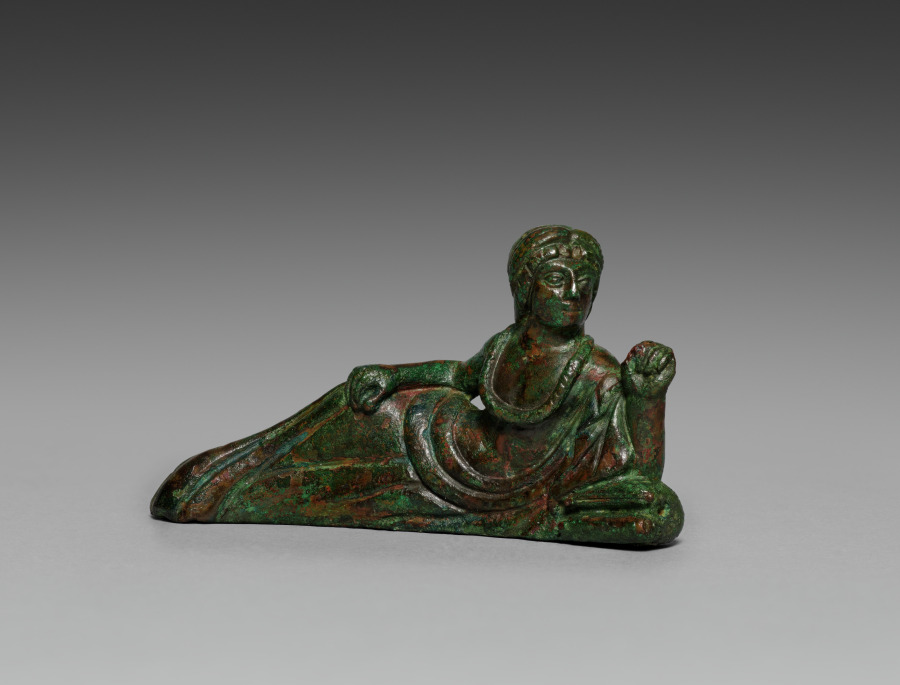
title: Vessel Ornament of Banqueter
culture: Etruscan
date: probably 400–375 BCE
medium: bronze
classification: Sculpture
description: This bronze banqueter figurine was one of six once adorning the rim of a large basin, now lost. Cast in molds with individualized details, most have grooves on their underside to attach to the basin. Minute traces of gilding remain on areas of clothing and skin (mostly visible only under magnification), suggesting that they may have been completely gilded. Two handles in the form of hippocampi, horses with serpentine tails, also belonged to the basin and are now displayed at the Michael C. Carlos Museum at Emory University. The basin may have been used to hold liquid for a banquet, or was perhaps funerary. This banqueter tilts his head toward his left hand, which may have once held an object, now lost. His right arm rests on his hip. Unlike the other banqueters, this figurine does not have exposed feet and his body curves slightly when viewed from above. This suggests that this figurine may have been made for a different initial use before being added to this set.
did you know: The Etruscan banquet shared similarities with the Greek symposium where guests reclined and drank wine.